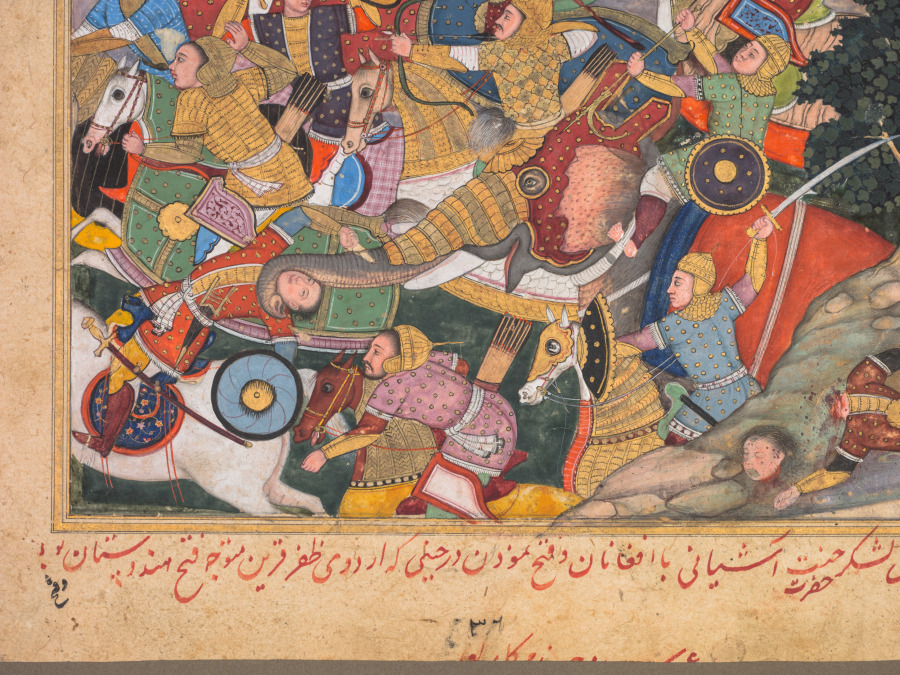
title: Mughal ruler Humayun defeating the Afghans before reconquering India, folio from an Akbar-nama (Book of Akbar) of Abu’l Fazl (Indian, 1551–1602)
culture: Mughal India, court of Akbar (reigned 1556–1605)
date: c. 1590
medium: Gum tempera, ink, and gold on paper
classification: Painting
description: In a battle that took place in 1555, the second Mughal emperor, Humayun, reconquered northern India from the Afghans with the help of Iranian military forces. His mounted figure stands out from the fray, with his golden helmet and red tunic silhouetted against a hillside in the upper center of the composition. To illustrate the beginning of hisown biography, Humayun’s son Akbar included this image of his father riding victoriously back to India. The scene never actually occurred in this way, since Humayun did not participate in this particular battle; his inclusion here is symbolic.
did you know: A well-trained war elephant can pull an opponent off his horse with its trunk.